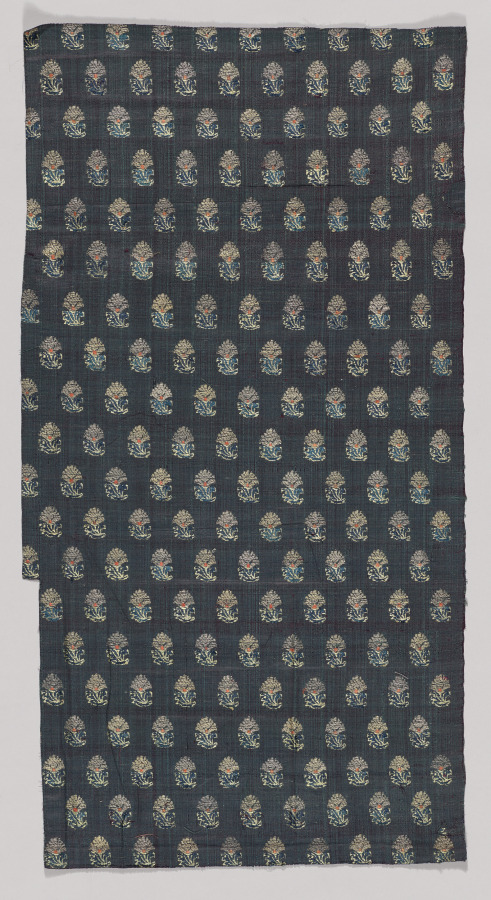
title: Fragment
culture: India, Warangal, 18th or 19th century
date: 1700s or 1800s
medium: brocade, "himru"; cotton, silk and gold thread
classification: Textile